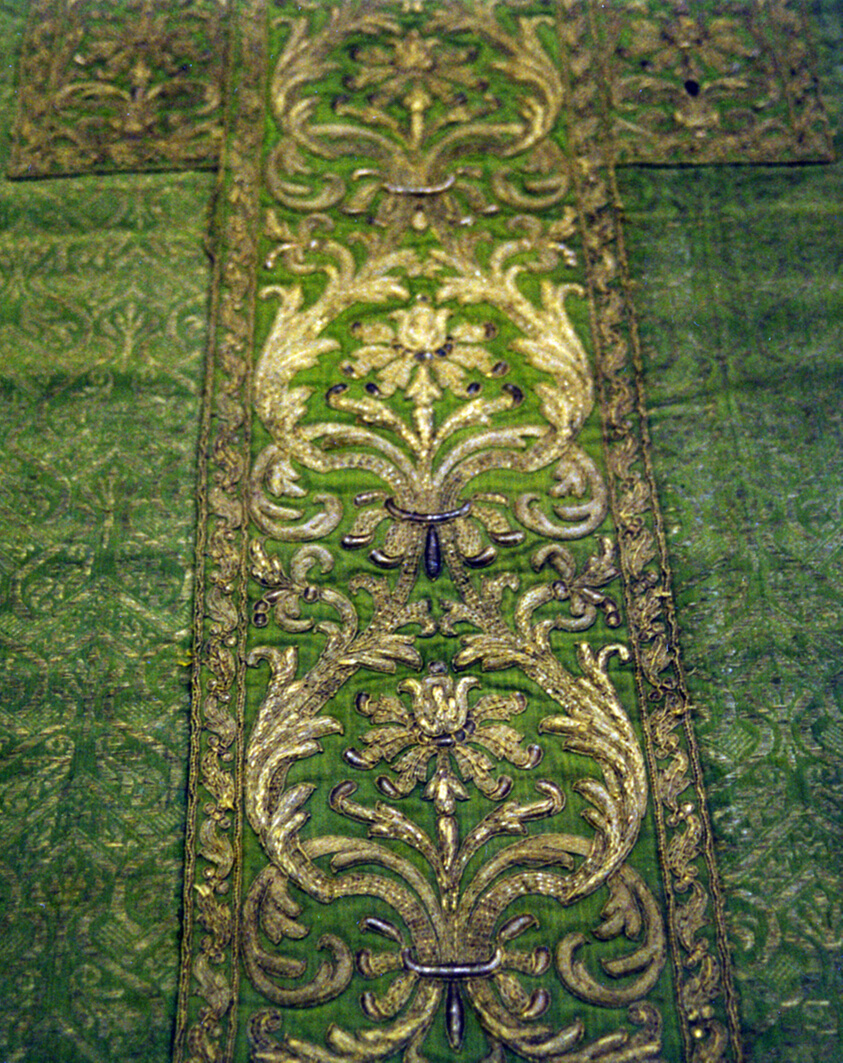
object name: Textile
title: Portion of Chasuble Back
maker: Italy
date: Late 16th/early 17th century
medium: Chasuble: silk and gilt-metal-strip-wrapped silk, plain weave with supplementary patterning wefts; orphrey cross: silk, plain weave with gilt-metal-strip supplementary facing wefts; embroidered in silk, gilt-metal-strips, gilt-metal-strips wrapped with gilt-metal-wire and gilt-metal-strip-wrapped silk, couching and padded couching over bast fiber padding; edged with silk, plain weave with gilt-metal-strip-wrapped silk supplementary facing wefts with extended weft uncut fringe; lined with silk, plain weave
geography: Italy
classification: textile; weaving; liturgical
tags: crosses, chevrons, botanical/floral